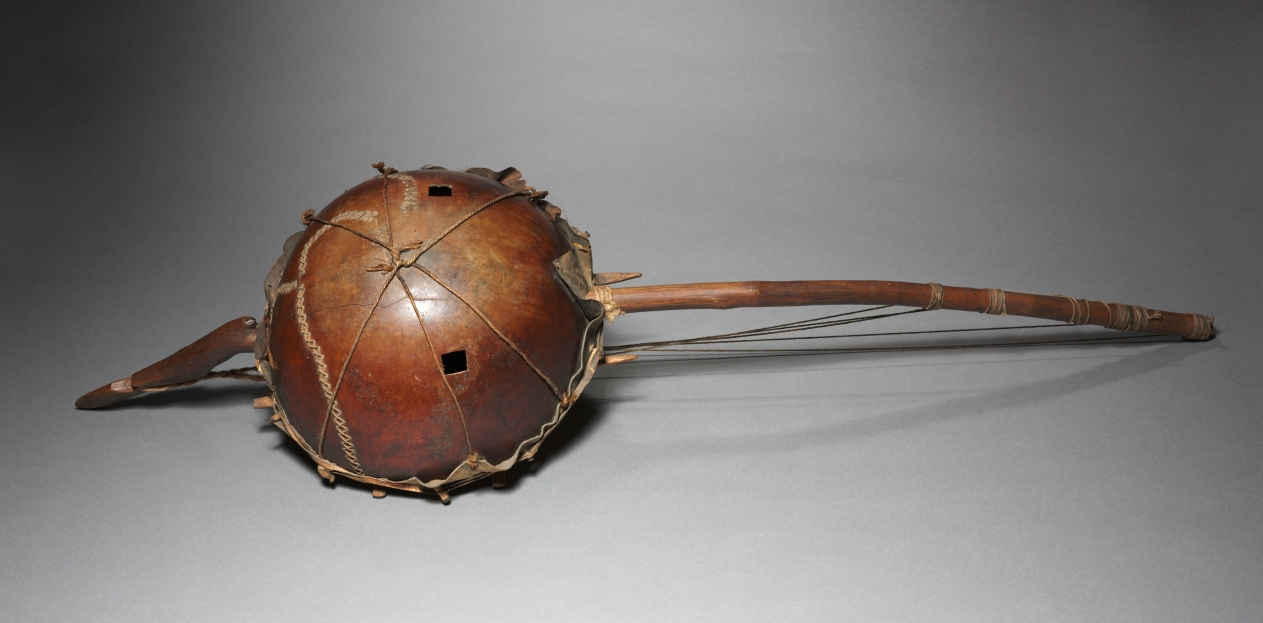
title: Kora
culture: Africa, unknown maker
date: before 1918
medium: Gourd, wood, rawhide, string, and rope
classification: Musical Instrument